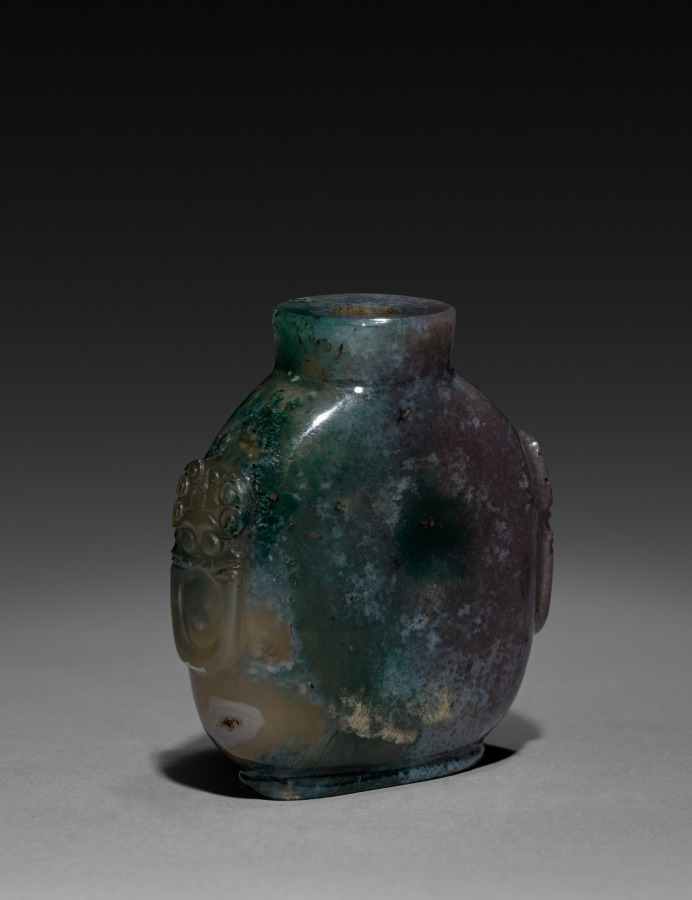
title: Snuff Bottle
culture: China, Qing dynasty (1644-1911)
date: 1644–1911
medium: glass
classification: Glass